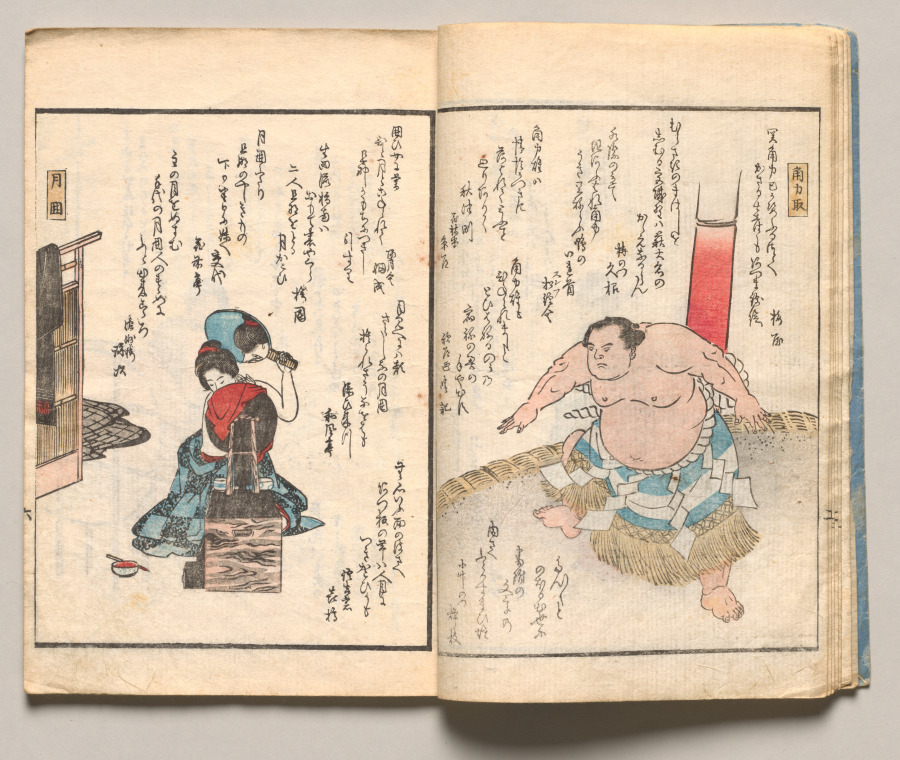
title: Spread Seven from Volume One of People of Japan in Light Verse (Kyōka)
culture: Japan, Edo period (1615–1868)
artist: Utagawa Hiroshige (Japanese, 1797–1858)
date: 1857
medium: Woodblock-printed book; ink and color on paper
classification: Bound Volume